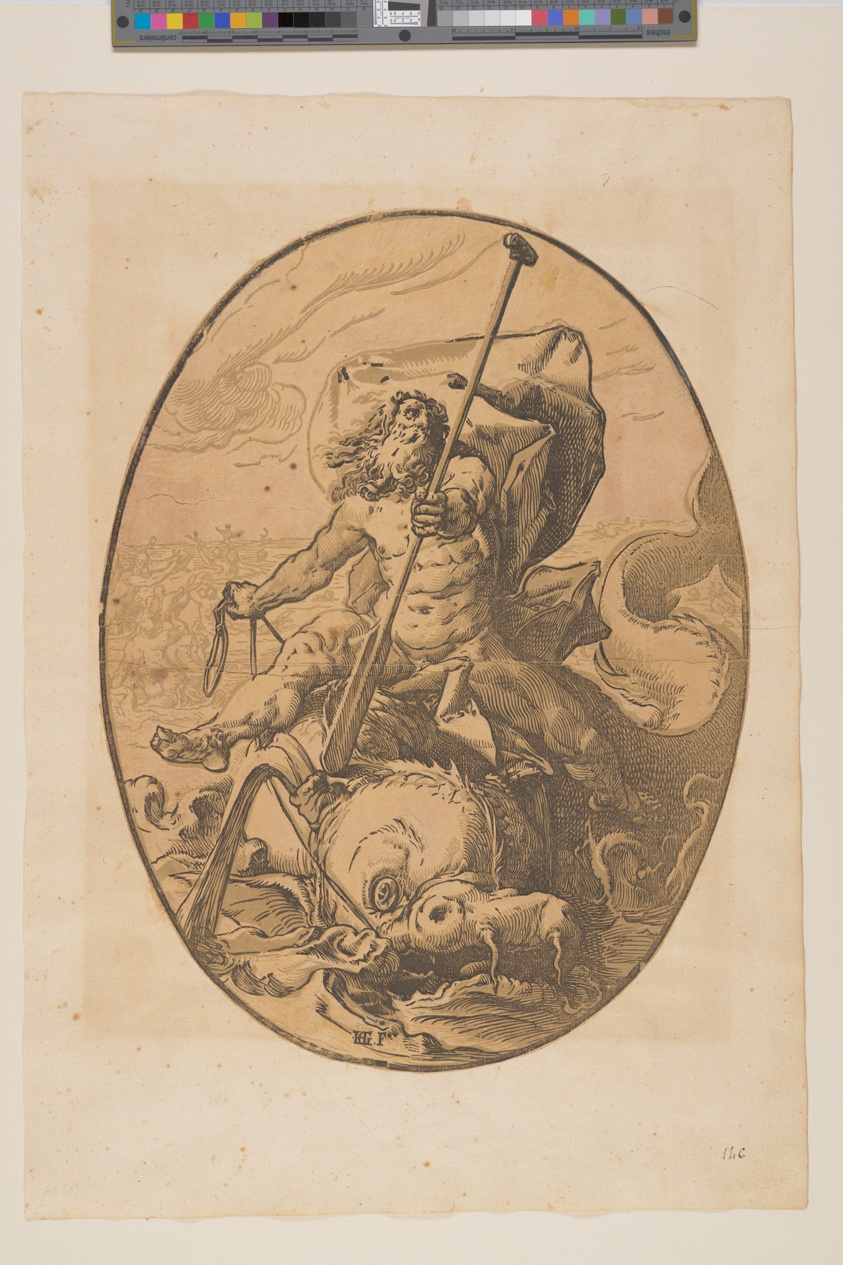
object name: Print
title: Oceanus, from The Deities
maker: Hendrick Goltzius (Dutch, 1558–1617)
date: 1588/90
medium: Chiaroscuro woodcut from three blocks in beige-green on ivory laid paper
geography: Netherlands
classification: print; paper; prints and drawing; woodcut